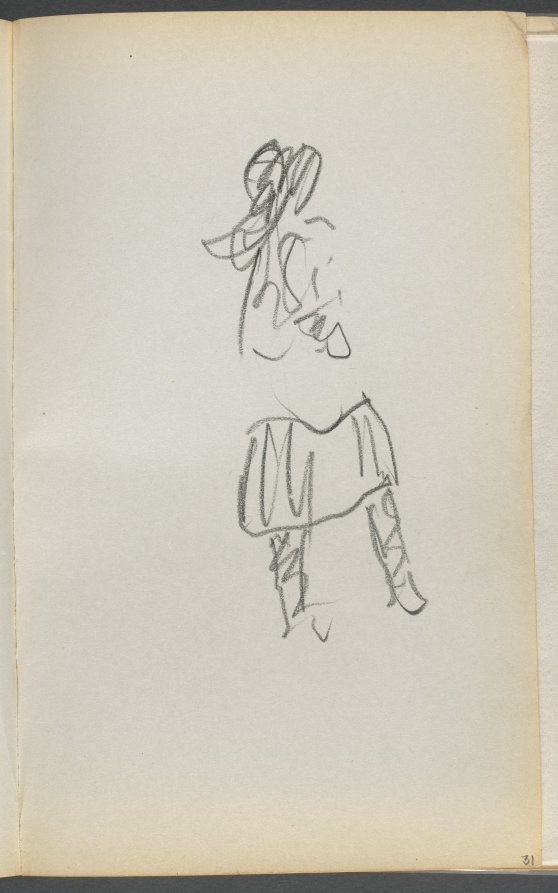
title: Sketchbook, The Dells, N° 127, page 031: Figure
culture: America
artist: Maurice Prendergast (American, born Newfoundland [now Canada], 1858–1924)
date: c. 1919–1921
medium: graphite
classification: Bound Volume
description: This sketchbook contains 59 pages of graphite drawings and 16 watercolors made at various locations on Cape Ann, Massachusetts.